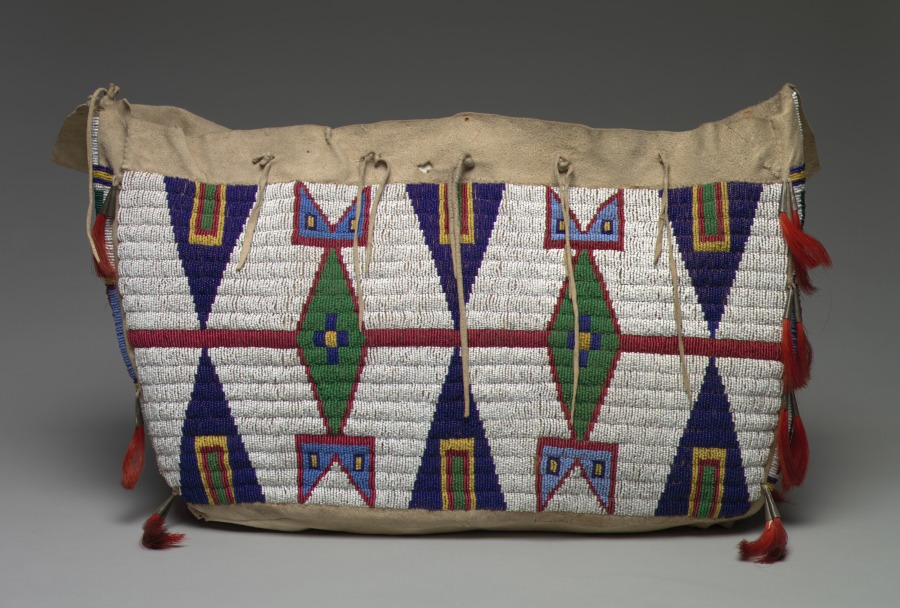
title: Storage Bag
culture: Native North America, Plains, Lakota (Sioux)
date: late 1800s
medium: Native-tanned hide, glass beads, dyed horsehair, tin cones, sinew thread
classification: Leather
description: Rectangular bags made of soft hide—known among early white traders as “possible bags” because they could hold “anything possible”—were used to store personal items inside the tipi, where they doubled as pillows. When encampments moved, the bags were carried on the side of a saddle, where their decoration could be admired.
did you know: Bags like this were used to store personal items inside the tipi, where they doubled as pillows.